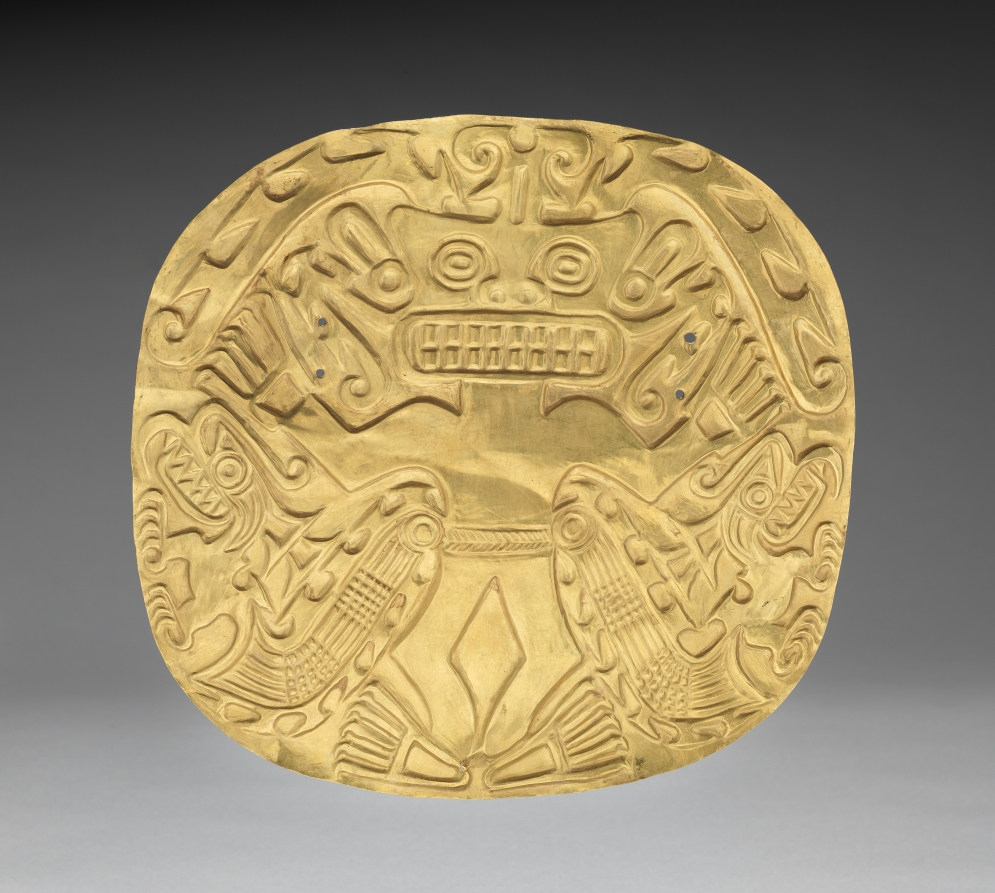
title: Pectoral (Chest Plaque)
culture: Intermediate Region, Panama, Conte style, 5th-10th Century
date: 400–900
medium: gold alloy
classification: Metalwork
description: Harvard archaeologists excavated this and seven other ornaments from several burials at Sitio Conte, a cemetery famous for its lavish graves of powerful chieftains. The young man buried in Grave 26 was such a chief. His status was stunningly memorialized by 21 human companions and 475 objects, many of them personal ornaments made of gold, including a large chest plaque and a rod-shaped ear ornament. The creature on the chest plaque, found close to the chief’s body, has reptile claws and perhaps the head crest of an iguana. Its meaning is unknown but perhaps, as in later periods, reptilian imagery and the warm gleam of gold linked rulers with the sun’s creative force.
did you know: Panning for gold was viewed as a sacred activity among the ancient inhabitants of Costa Rica and Panama.